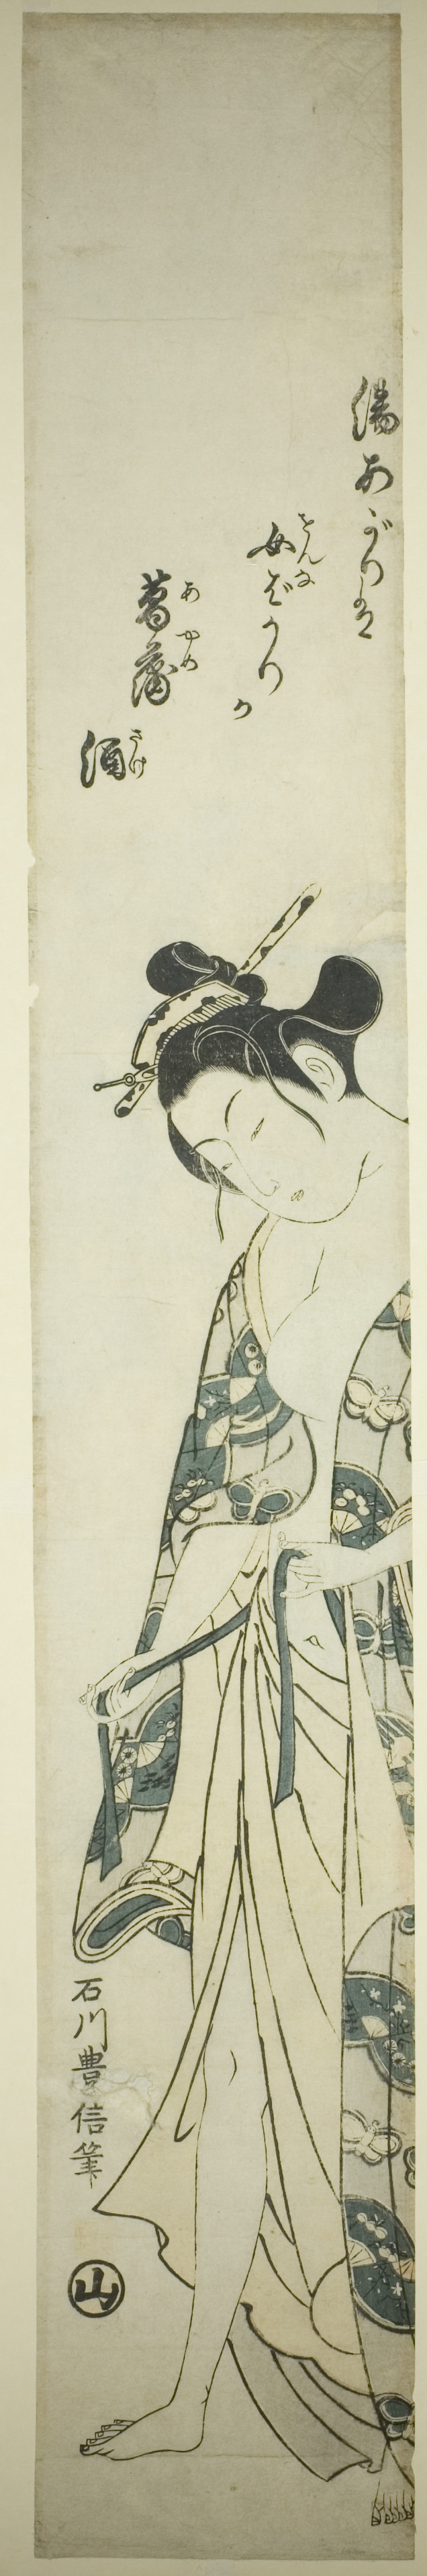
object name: Print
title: Woman Dressing after Her Bath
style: Japanese (culture or style)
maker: Ishikawa Toyonobu (Japanese, 1711-1785)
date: c. 1755/65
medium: Color woodblock print; hashira-e, benizuri-e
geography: Japan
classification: woodblock print; print; asian art